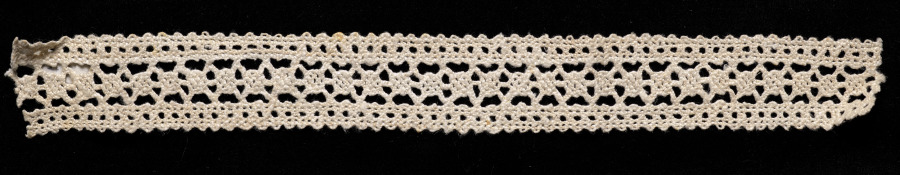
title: Lace Insertion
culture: Italy, Venice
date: 1540–60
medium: Bobbin lace, needle lace (drawnwork) design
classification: Lace